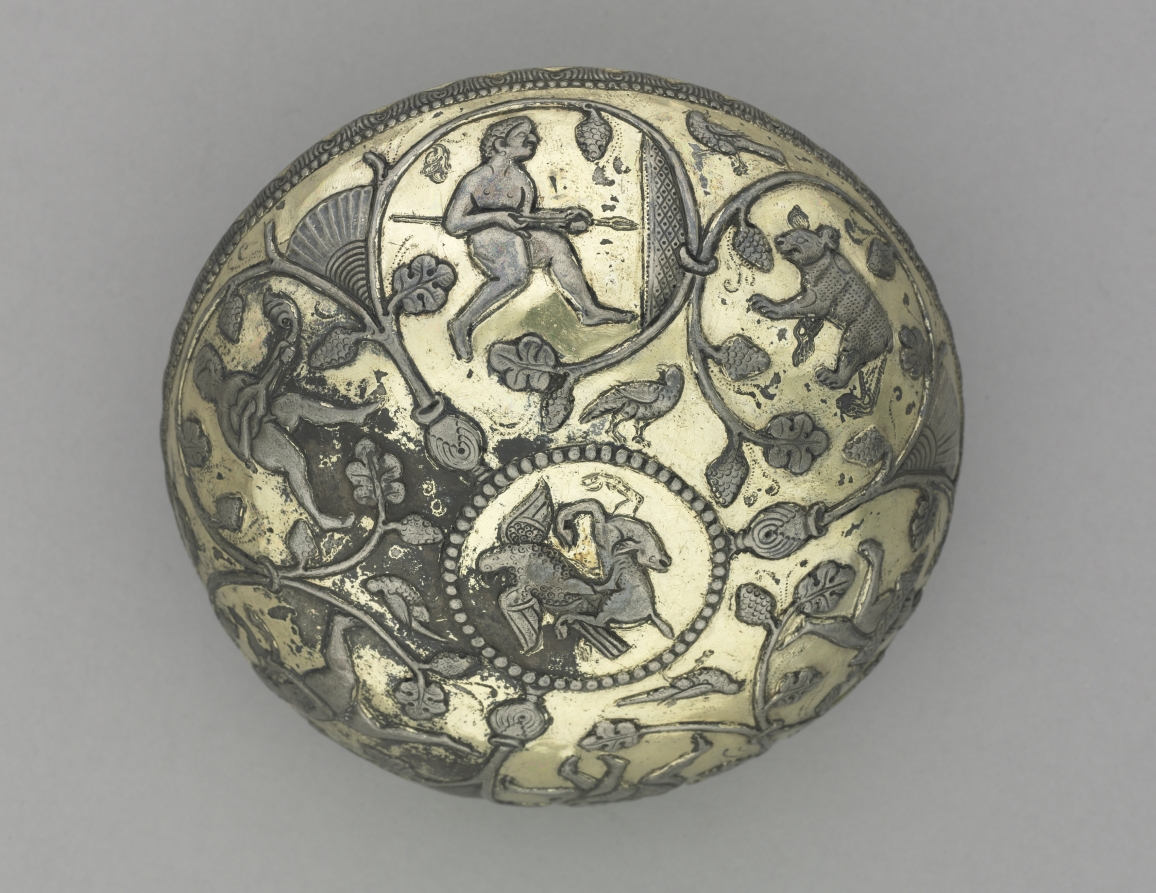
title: Bowl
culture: Iran, Sasanian Empire (224–651 CE)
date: 500–700 CE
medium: silver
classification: Metalwork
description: Every good Zoroastrian was supposed to spend one-third of his day farming; one-third philosophizing; and one-third eating, resting, and at pleasure. The abundance of Sasanian luxury goods is evidence of the importance accorded the last third of the day.